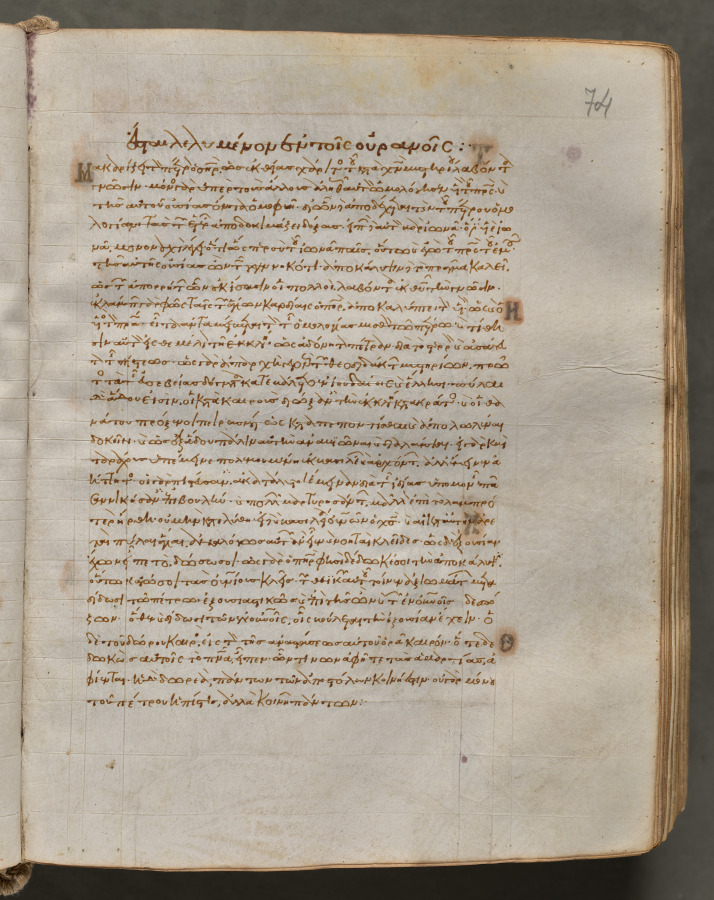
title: Text, folio 74 (recto), from a Gospel Book with Commentaries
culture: Byzantium, Constantinople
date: c. 1000–1100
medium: ink, tempera, and gold on vellum; leather binding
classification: Bound Volume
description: Each of the four gospels in this book opens on a page with brilliantly illuminated borders depicting the author of the text as well as birds-principally peacocks, symbols of the immortality of the soul-and fountains, representing the fountain of life and the salvation of the soul. This volume consists of 428 leaves with texts in Greek. Its level of sophistication suggests that it was probably written and decorated in a monastery in Constantinople.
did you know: Gospel Books were carried in procession through Byzantine churches.